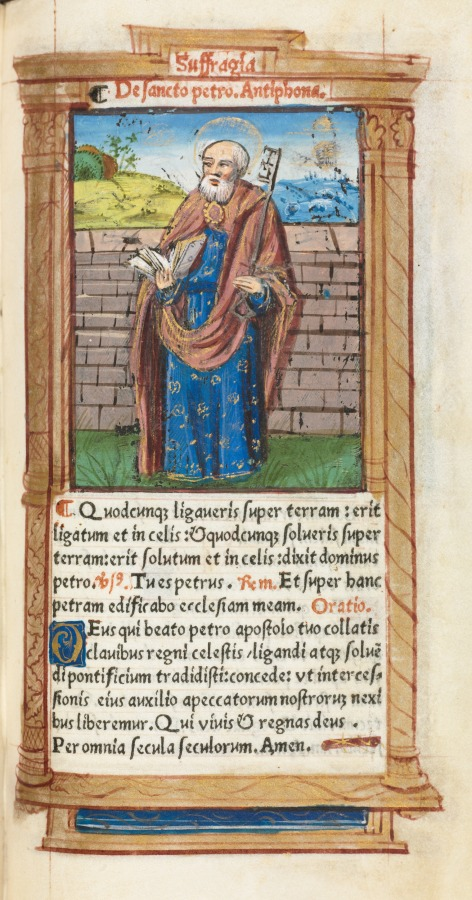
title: Printed Book of Hours (Use of Rome): fol. 99r, St. Peter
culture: France, Paris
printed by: Guillaume Le Rouge (French, Paris, active 1493–1517)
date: 1510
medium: 112 Printed folios on parchment, bound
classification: Bound Volume